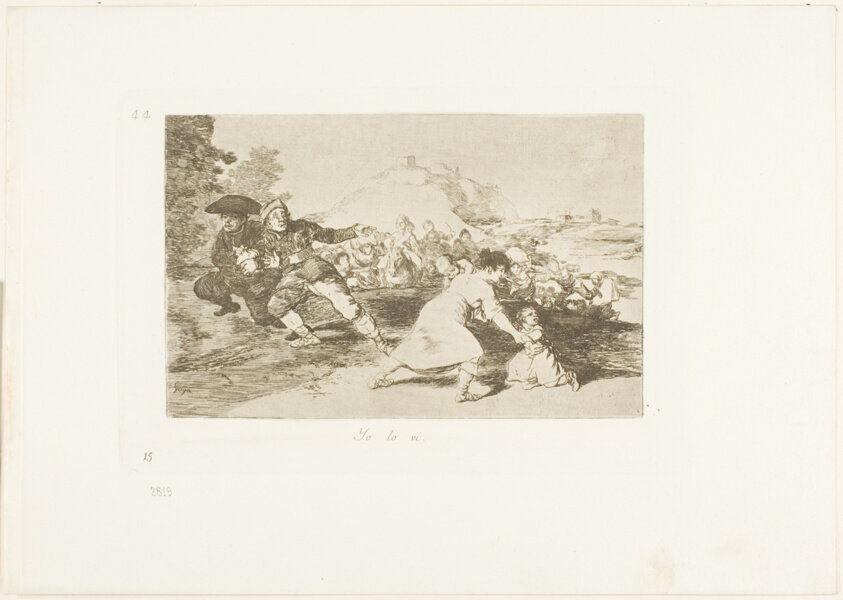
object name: Print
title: I Saw it, plate 44 from The Disasters of War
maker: Francisco José de Goya y Lucientes (Spanish, 1746-1828)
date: 1810/12, published 1863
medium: Etching, drypoint and burin on ivory wove paper with gilt edges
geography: Spain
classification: etching; print; prints and drawing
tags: war